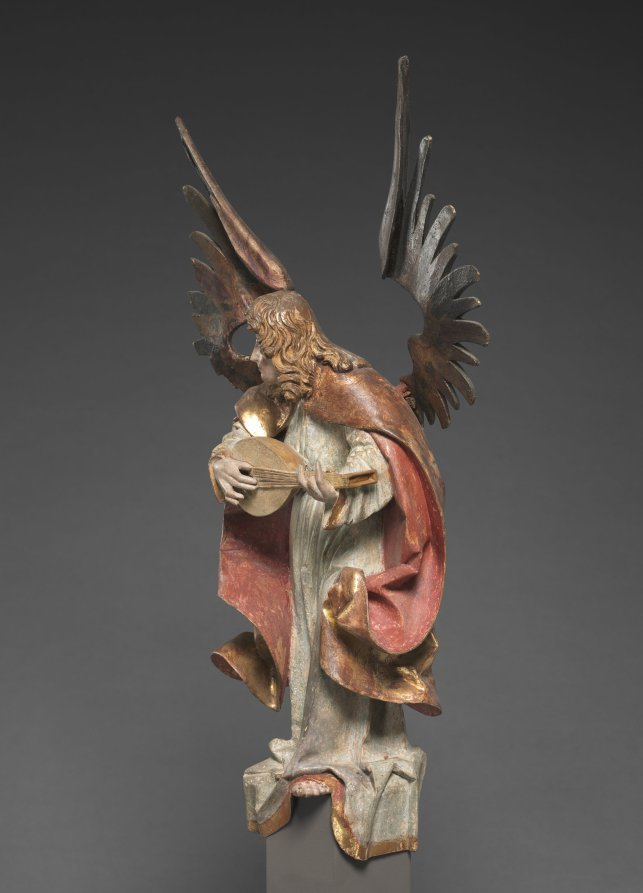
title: Lute-playing Angel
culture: Austria, Tyrol, early 16th Century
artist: Hans Schnatterpeck (Austrian)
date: made shortly after 1503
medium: Black Forest balsalm fir with polychromy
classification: Sculpture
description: This sculpture was originally placed at the top of the altarpiece of the high altar in the church at Nieder Lana, near Meran, in the South Tyrol (now part of present-day North Italy). The sculptor had contracted in 1503 to complete this altar within eight years for the payment of 1,600 gilders. Hans Schnatterpeck was originally from Landsberg am Lech in Bavaria. By 1478-79 he had settled in Meran where he operated the leading workshop in the area. This angel is a surviving element from his most famous work, the largest Gothic altarpiece of the Alpine region. Other elements survive in various public and private collections.